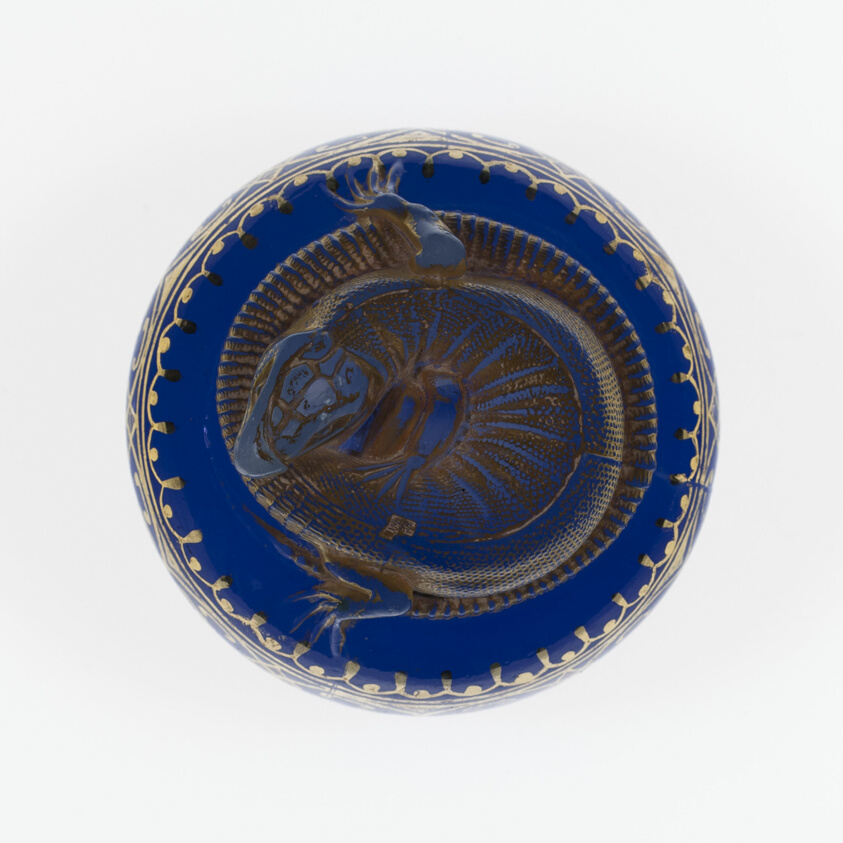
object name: Glass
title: Paperweight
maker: Saint-Louis Glassworks (Cristalleries de Saint-Louis); Lorraine, France, founded 1586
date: c. 1845–60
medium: Glass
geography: Saint-Louis-lès-Bitche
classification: paperweight; glass